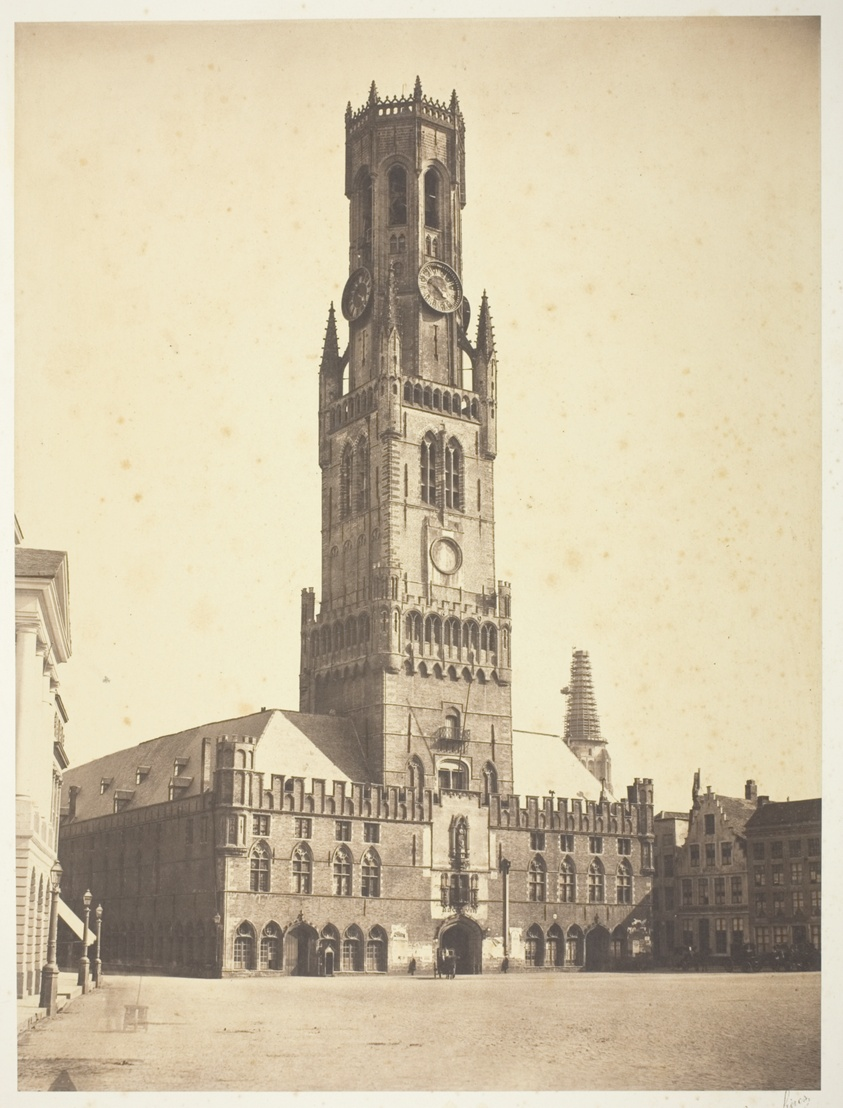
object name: Photograph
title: Bruges, Belgium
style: 19th century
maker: Bisson Frères (Louis-Auguste Bisson, French, 1814–1876 and; Auguste-Rosalie Bisson, French, 1826–1900)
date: 1854/55, printed 1855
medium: Albumen print, from the album "Reproductions photographiques des plus beaux types d’architecture et de sculpture"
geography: France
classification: albumen silver print; photographic process; photography; photograph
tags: Collected by Hugh Edwards, architecture